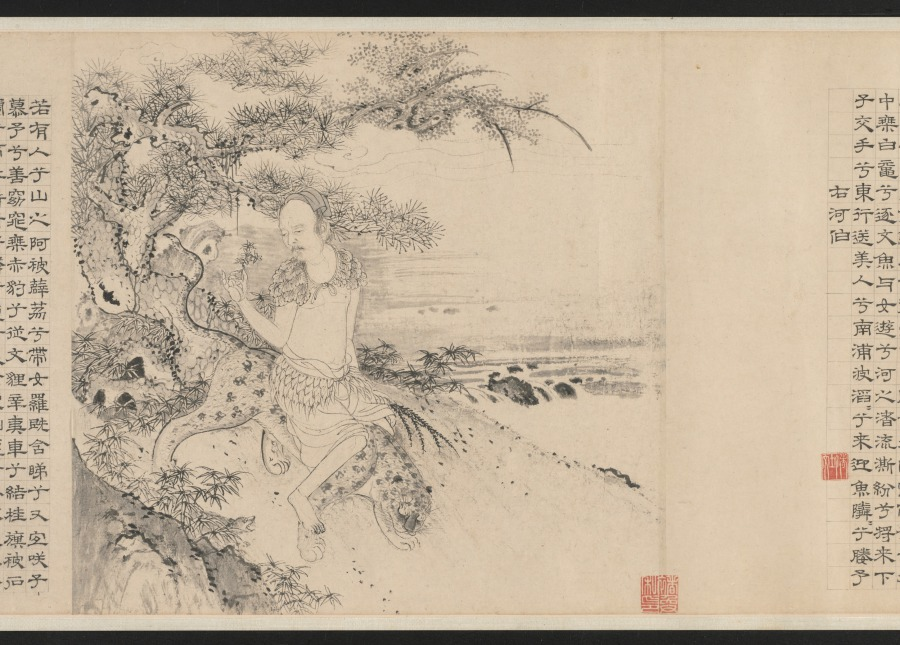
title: Nine Songs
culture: China, Yuan dynasty (1271-1368)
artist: Zhang Wo (Chinese, active c.1336–after 1364)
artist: Chu Huan (Chinese, active 1361)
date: 1361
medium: handscroll; ink on paper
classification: Painting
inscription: 7 colophons and 47 seals: 1 colophon, dated 1361, and 28 seals of Chu Huan 褚奐 (active c. 1361); 1 colophon, dated 1785, and 1 seal of Lu Shihua 陸時化 (1714-1779); 2 seals of Lu Yü-ch'ing (18th c.); 1 colophon, dated 1935, of Ye Gongchuo 葉恭綽 (1881-1968); 1 colophon, dated 1935, of Wu Hufan 吳湖帆(1894–1968); 1 colophon, dated 1938, and 1 seal of Wang Tongyu 王同愈 (1856-1941); 1 colophon, dated 1941, of Wu Huayuan 吳華源 (1893-1972); 1 colophon, dated 1942, and 9 seals of Xu Bangda 徐邦達 (1911–2012); 1 colophon, dated 1942, of Lang Jingshan 郎靜山 (1892-1995); 1 colophon, dated 1944, of Tang Yun 唐雲 (1910-1993); 6 seals of Wang Jiqian [C.C. Wang] 王季遷 (1907–2003).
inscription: Text of The Nine Songs written by Chu Huan at the end of each section.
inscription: 右離騷九歌圖，宋龍溟居士李公本，淮南張渥叔厚所畫妙絕當世。家藏請予書其辭目識于左。至正二十一年辛醜三月旦河南褚奐記。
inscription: Colophon by Lu Shihua 陸時化 (1714–1789): This scroll is fortunate to have been handed down from collections of the right people. Now, after 500 years, its condition is as good as when it was painted. I acquired this from Mr. Shen Guiyu [1673-1769], the President of the Board of Rites. The label is in his handwriting when he was 95 years old. I submit that Chu Huan (t. Shiwen) of the Yuan Dynasty was a native of Qiantang. His "seal" and li writings are in the style of Wu Rui. For example, in [Chu Kuei's] Ming ji lu [A list of masterpieces] is recorded the stele commemorating the restoration of the prefectural school of Kun-shan, the text of which was composed by Yang Weizhen in the twenty-first year of Zhizheng [1361]; and the calligraphy as well as the title in li style was by Chu Huan, who was at that time an assistant judge of the prefecture of Haining in the circuit of Hangzhou. Zhang Wo's zi is Shuhou (叔厚). His literary name is Zhen Qisheng (贞期生). According to [Gu Ying's] Yu shan cao tang ya jii, he liked to paint in the bai-miao or the "pure delineation" style after the method of Li Longmian [Li Gonglin 李公麟], which finds no peer among the ancient masters. This is agreed upon [by Pei Ch'iung] in his Qing jiang zhi who praised [Zhang Wo] as being quite learned and well-versed in many branches of the arts, especially figure painting. Recorded by Lu Shihua [The mountain dweller], listening to the pine, in the twelfth month of the yisi year [1785].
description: Painted in the baimiao, or fine-line drawing style, this ancient work demonstrates the literati’s use of abstract calligraphic brushwork for self-expression. The subject of the “Nine Songs”—songs associated with shamanistic rituals in the ancient Chu kingdom—had traditionally provided artists with myths and legends that they could explore and reinterpret in their own works.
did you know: Divided into eleven sections, the scroll contains illustrations by painter Zhang Wu followed by a transcription of the relevant verse by calligrapher Chu Huan.